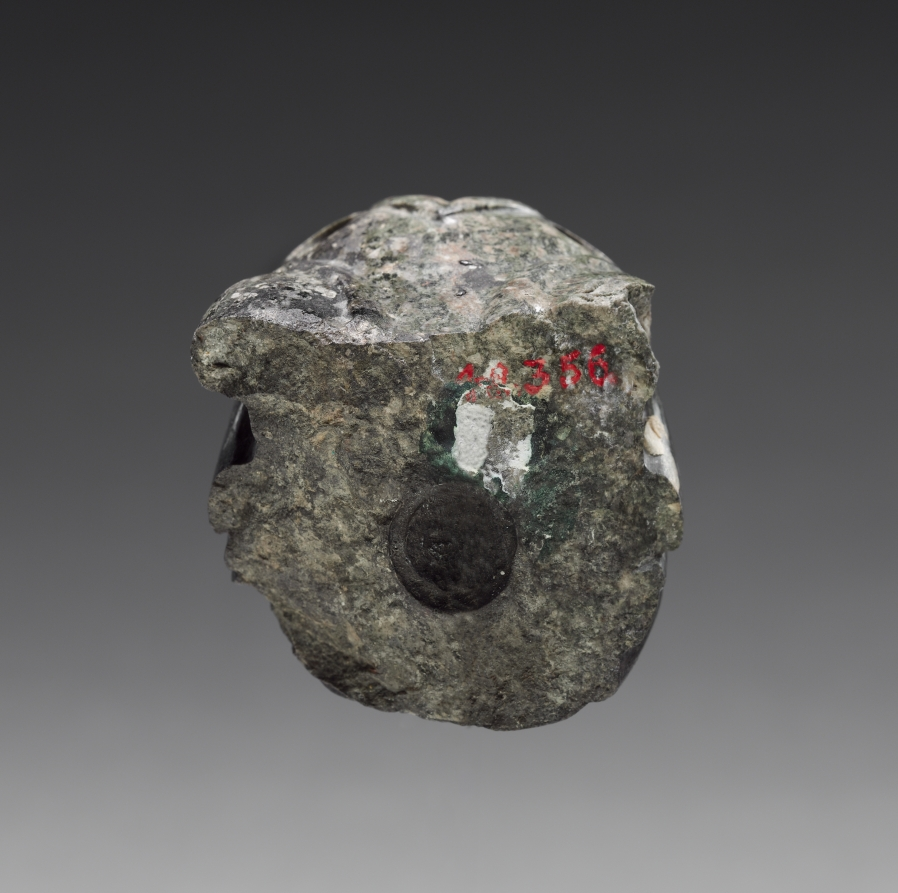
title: Head in Mouth of Snake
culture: Central Mexico, Aztec, Post-Classic Period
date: 1325–1519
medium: greenstone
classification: Stone